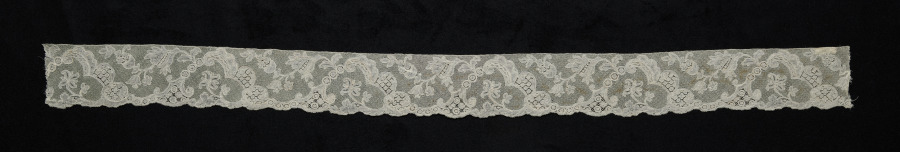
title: Lace Edging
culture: Belgium, Mechelen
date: 1700s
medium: Bobbin lace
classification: Lace